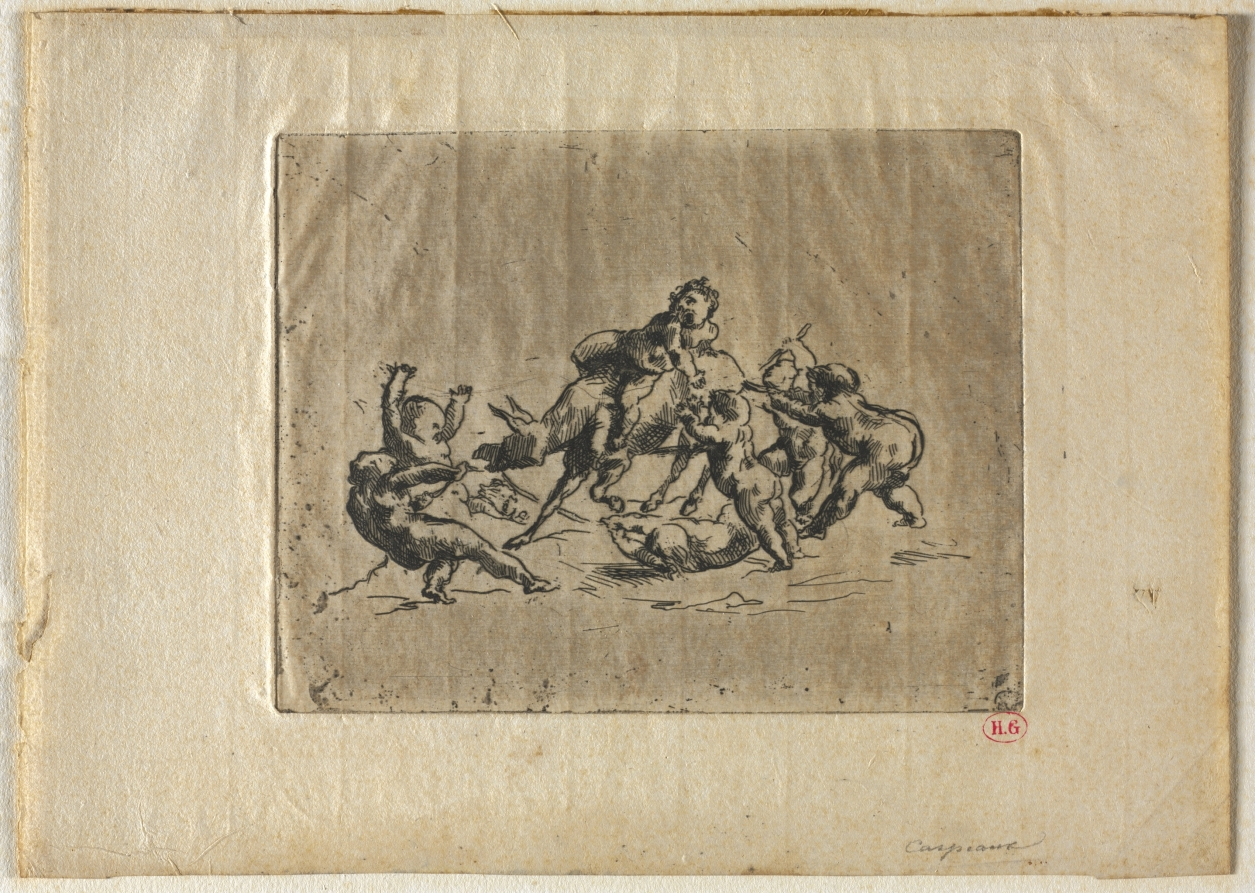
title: Bacchanal with Children and Donkey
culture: France, 19th century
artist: Jean-Baptiste Carpeaux (French, 1827–1875)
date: c. 1860–70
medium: etching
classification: Print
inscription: below the lower right platemark edge: stamp for Hector Giacomelli (Lugt 1311)